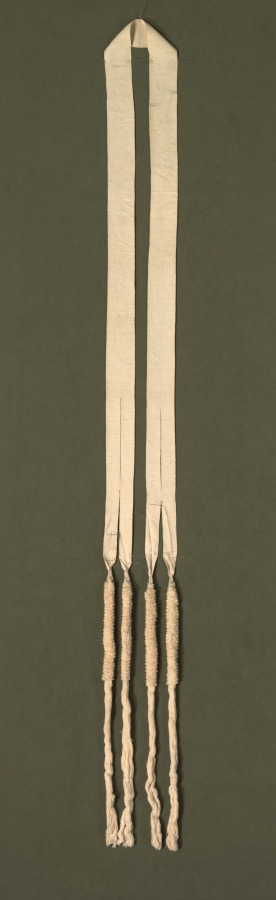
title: Band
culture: Peru, Chimú or Chimú-Inka, 12th-16th century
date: 1100–1532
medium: white cotton; plain weave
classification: Textile